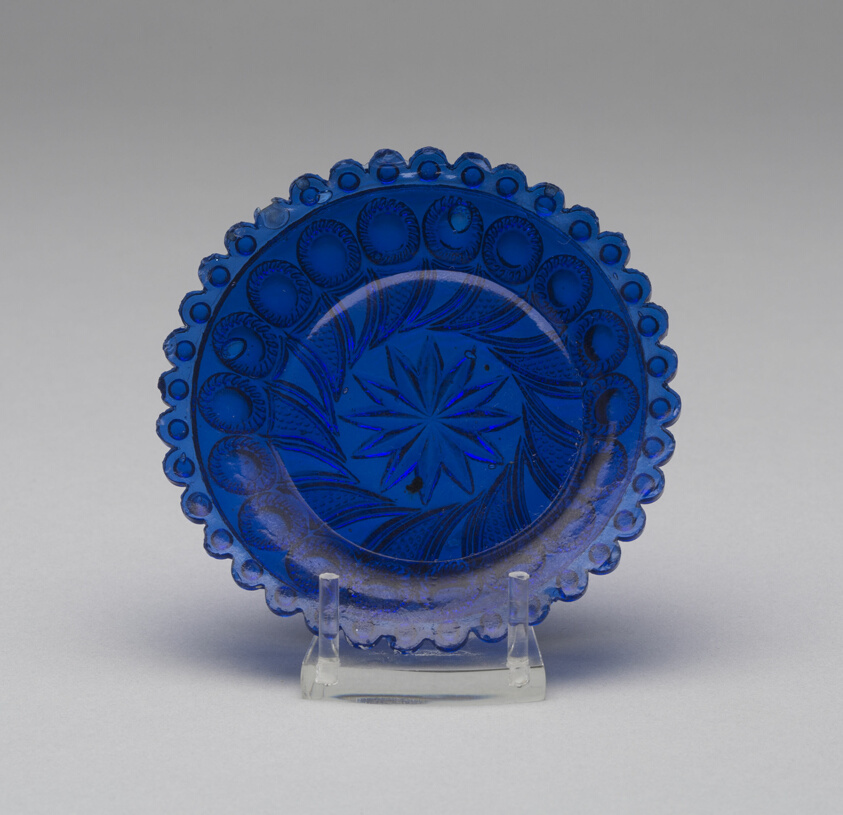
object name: Glass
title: Cup plate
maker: Artist unknown (American, 19th century); Probably Pittsburgh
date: 1830–35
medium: Pressed glass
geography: Pittsburgh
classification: plate (general, dish); glass; american decorative arts; american arts; decorative arts